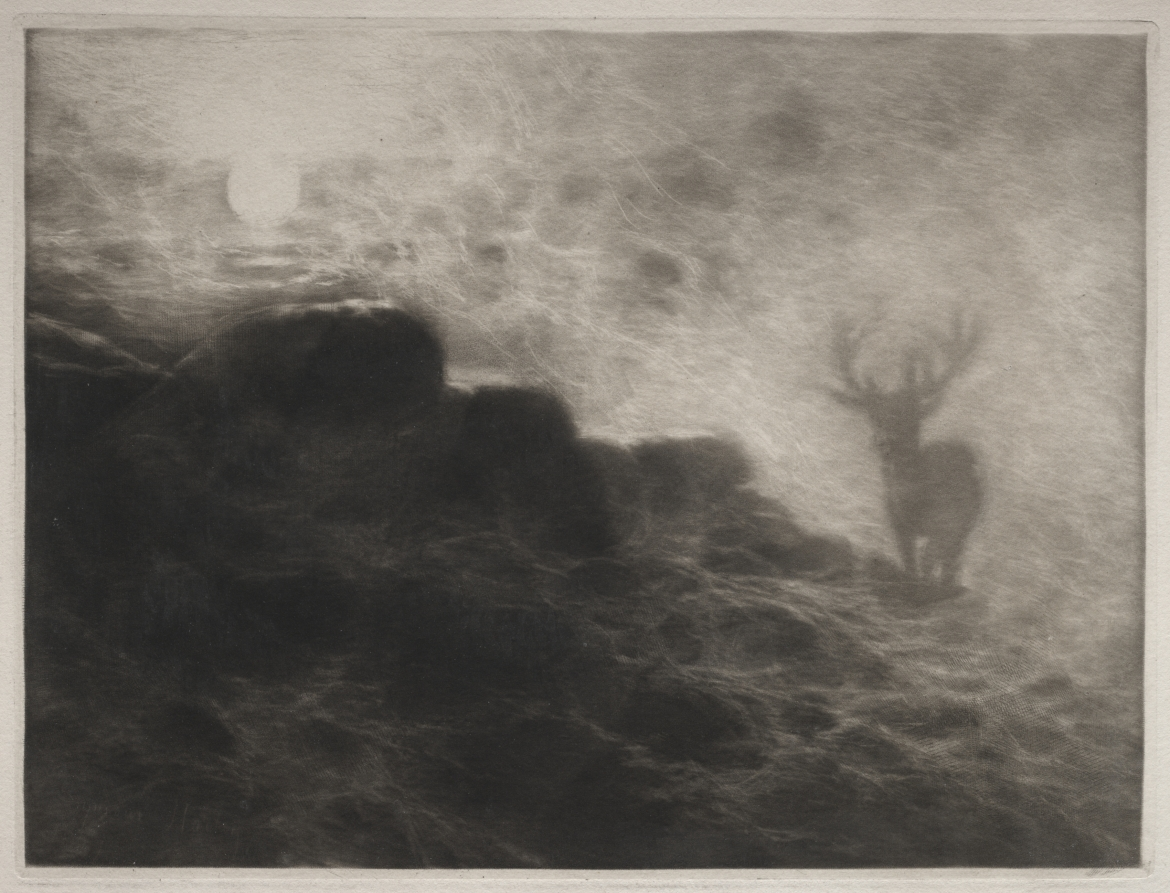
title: An Early Riser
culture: England, 19th century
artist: Francis Seymour Haden (British, 1818–1910)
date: 1897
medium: mezzotint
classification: Print